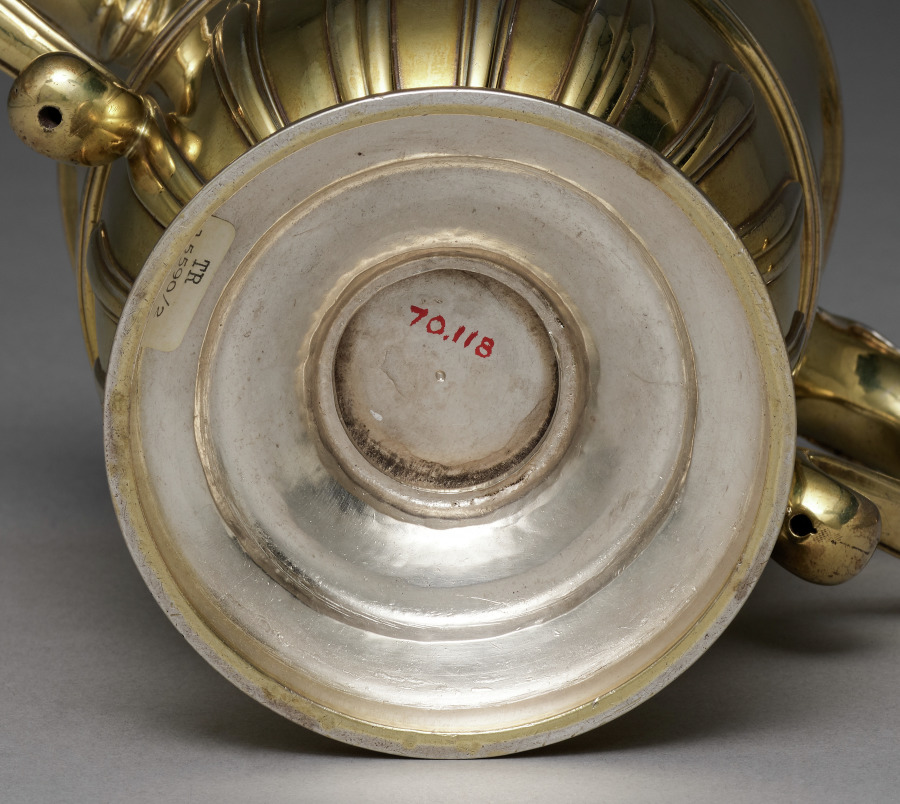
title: Covered Cup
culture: England, London, 18th century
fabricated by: Gabriel Sleath (British, 1674–1756)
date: 1723–1724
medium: silver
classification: Silver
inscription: engraved in the center of the cup is a demi-lion, rampant passant, holding an unknown object on an irregularly shaped shield surrounded by baroque manteling. In style, it is appropriate for date of cup but does not appear a true coat of arms. On the cover is a crest consisting of a demi-lion, rampant passant, between open buffalo horns. These heraldic devices perhaps refer to some entity rather than an individual.